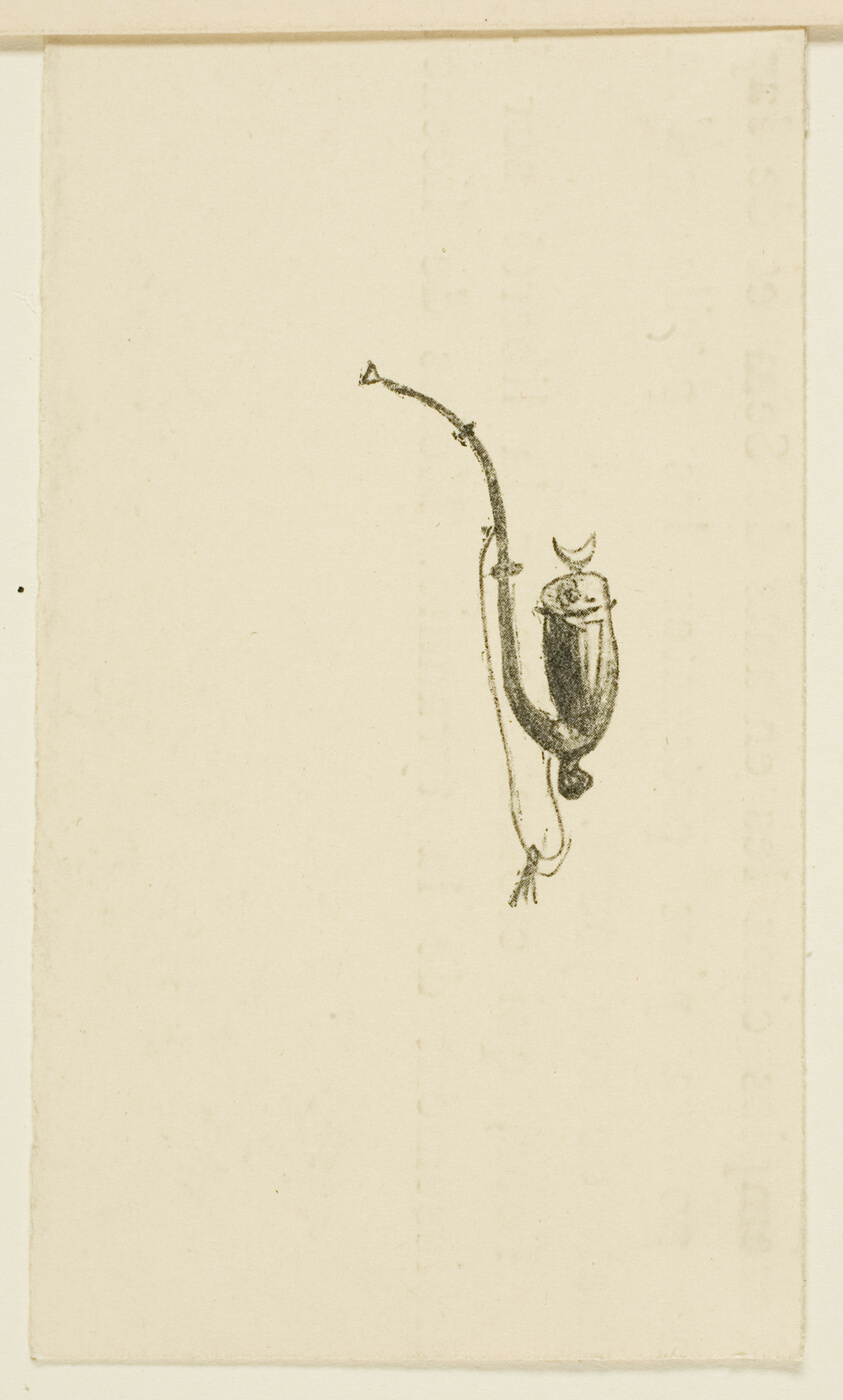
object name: Print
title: Tailpiece from Au Pied du Sinaï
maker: Henri de Toulouse-Lautrec (French, 1864-1901)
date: 1897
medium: Reproduction of a lithograph on cream wove paper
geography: France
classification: print (reproduction); prints and drawing; print